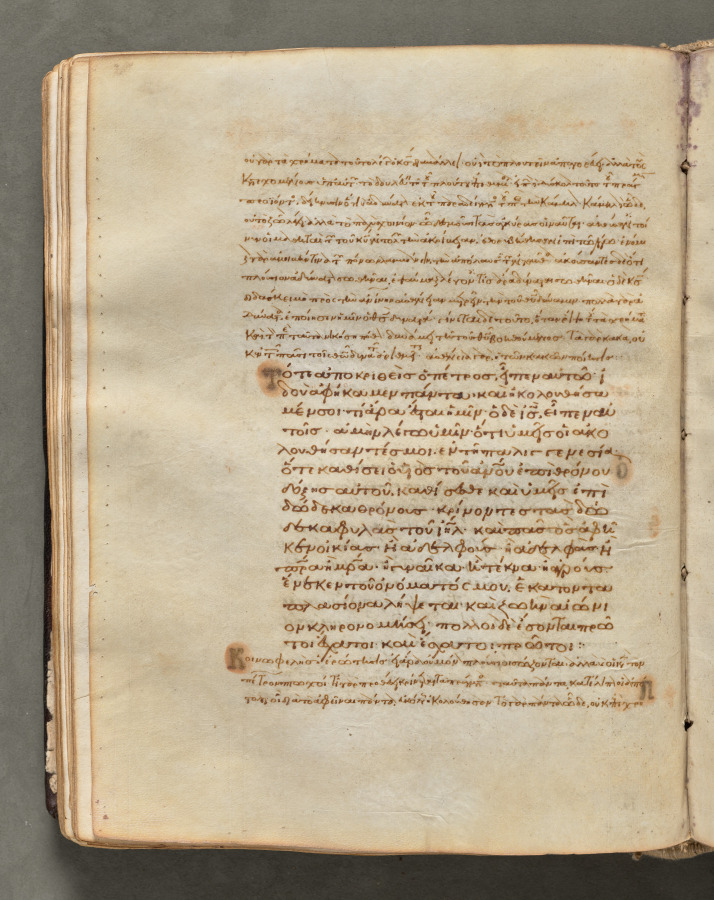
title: Text, folio 86 (verso), from a Gospel Book with Commentaries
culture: Byzantium, Constantinople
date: c. 1000–1100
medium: ink, tempera, and gold on vellum; leather binding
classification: Bound Volume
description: Each of the four gospels in this book opens on a page with brilliantly illuminated borders depicting the author of the text as well as birds-principally peacocks, symbols of the immortality of the soul-and fountains, representing the fountain of life and the salvation of the soul. This volume consists of 428 leaves with texts in Greek. Its level of sophistication suggests that it was probably written and decorated in a monastery in Constantinople.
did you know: Gospel Books were carried in procession through Byzantine churches.